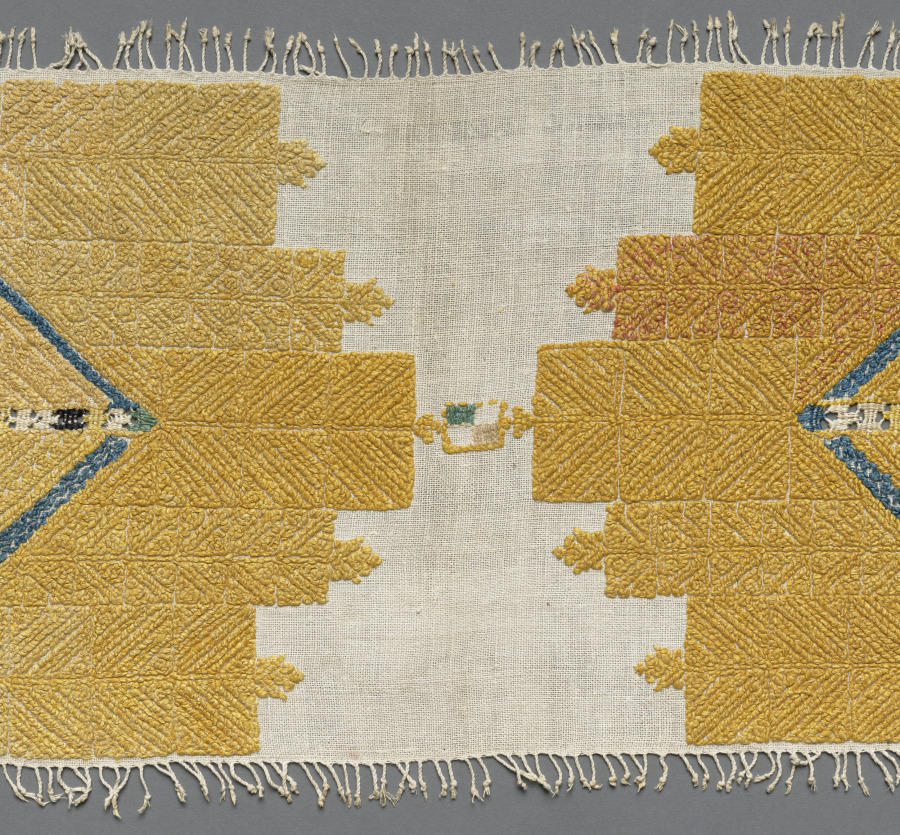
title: Furnishing textile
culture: Africa, North Africa, Morocco, Chefchaouen, Moroccan embroiderer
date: 1800s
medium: Linen, silk, dye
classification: Embroidery